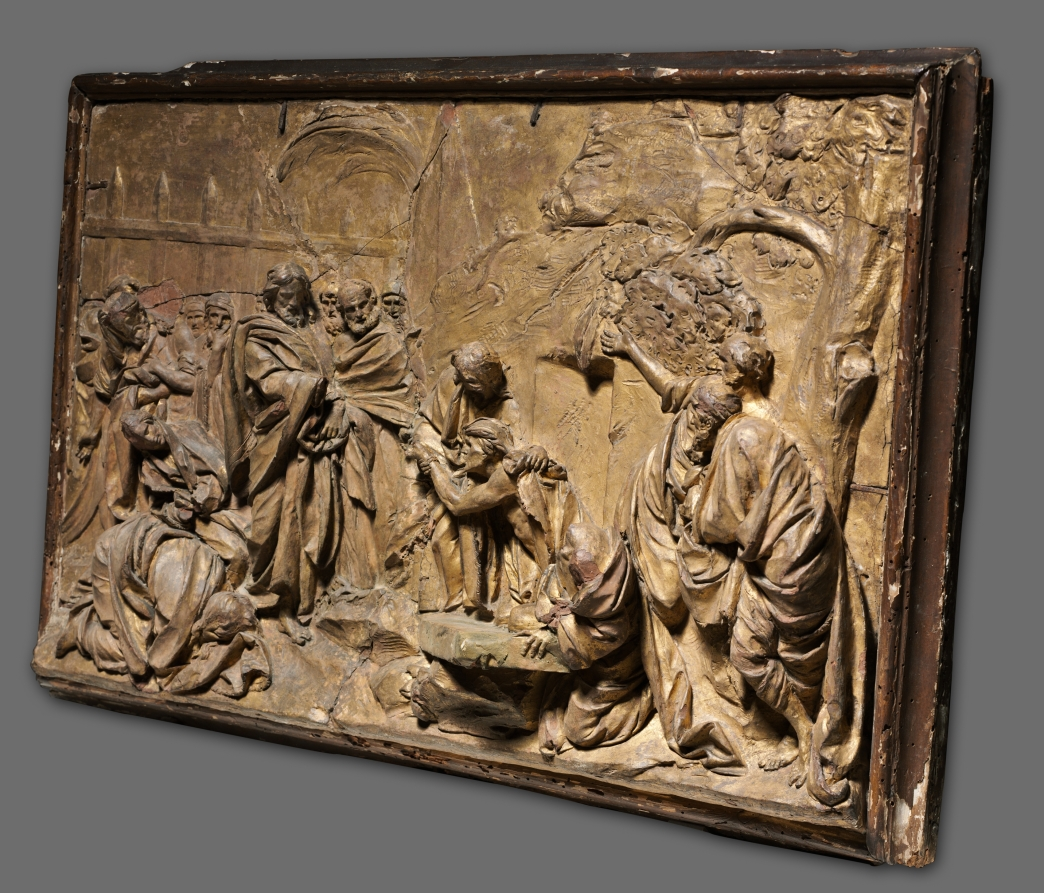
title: The Raising of Lazarus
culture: Italy, Rome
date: c. 1725–50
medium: gilded terracotta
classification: Sculpture